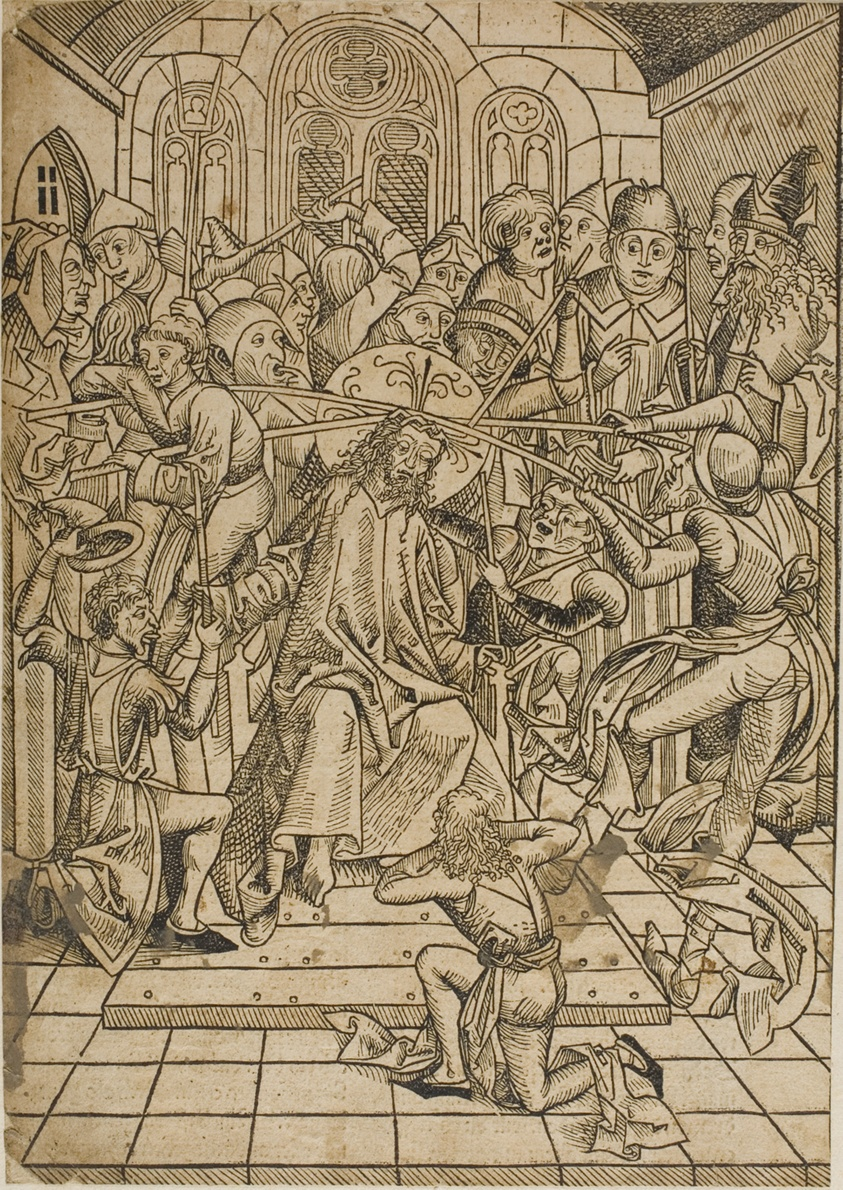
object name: Print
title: Christ Crowned with Thorns, page 72 from the Treasury (Schatzbehalter)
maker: Michael Wolgemut and Workshop (German, 1434/37–1519); published by Anton Koberger (German, 1440–1513)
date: 1491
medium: Woodcut on cream laid paper, with letterpress on verso, laid down on ivory wove album sheet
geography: Germany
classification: woodcut; print; prints and drawing